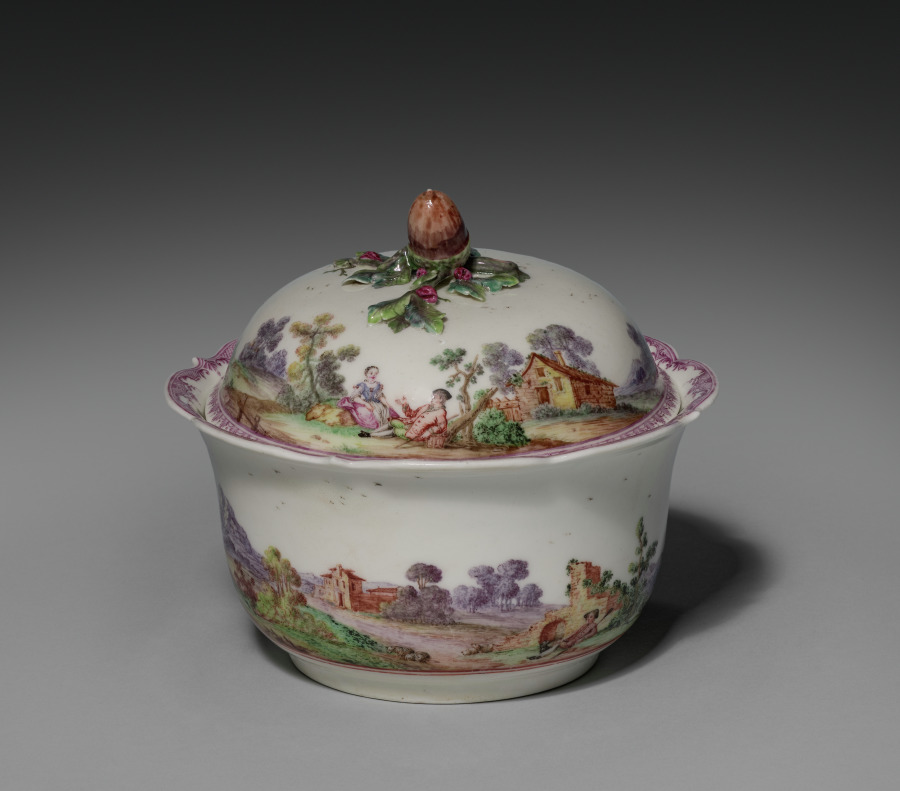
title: Covered Sugar Bowl (Pot à sucre)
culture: France, Vincennes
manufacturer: Vincennes Porcelain Manufactory (French, 1740–1756)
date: 1745–48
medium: soft-paste porcelain with enamel decoration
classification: Ceramic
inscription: In red on bottom of bowl: P.M. In red on interior of lid: P.M. 16 4.8B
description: This covered bowl, likely intended for sugar, is one of the earliest surviving examples of Vincennes porcelain, a reputed French factory moved to Sèvres in 1756. The continuous landscape is painted on this object en pointillé, a method by which a painter forms images with tiny dots. This style may have been influenced by their German competitors at the Meissen Porcelain Factory.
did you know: Three separate shades of purple, one of the most expensive colors to produce on porcelain during this time, are used extensively in this object’s paintings.